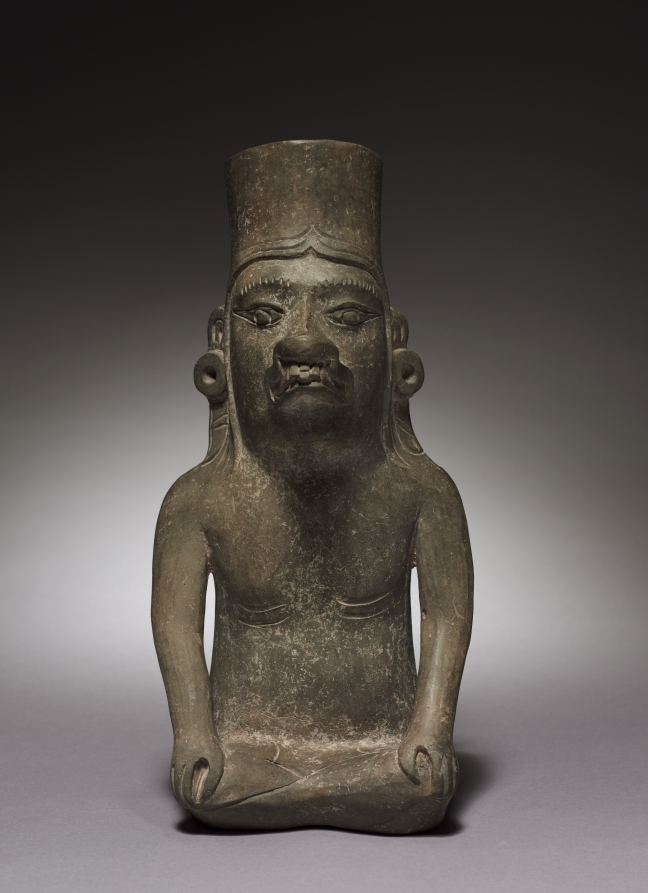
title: Urn Figure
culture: Mexico, Oaxaca, Zapotec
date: c. 150 BCE–200 CE (thermoluminescence date, 60 BCE–642 CE)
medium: earthenware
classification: Sculpture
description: This simply posed and costumed urn figure represents a goddess, or perhaps an ancestress. Early Zapotec ceramic art has a spare elegance that contrasts strongly with the florid ornamentation of later works.